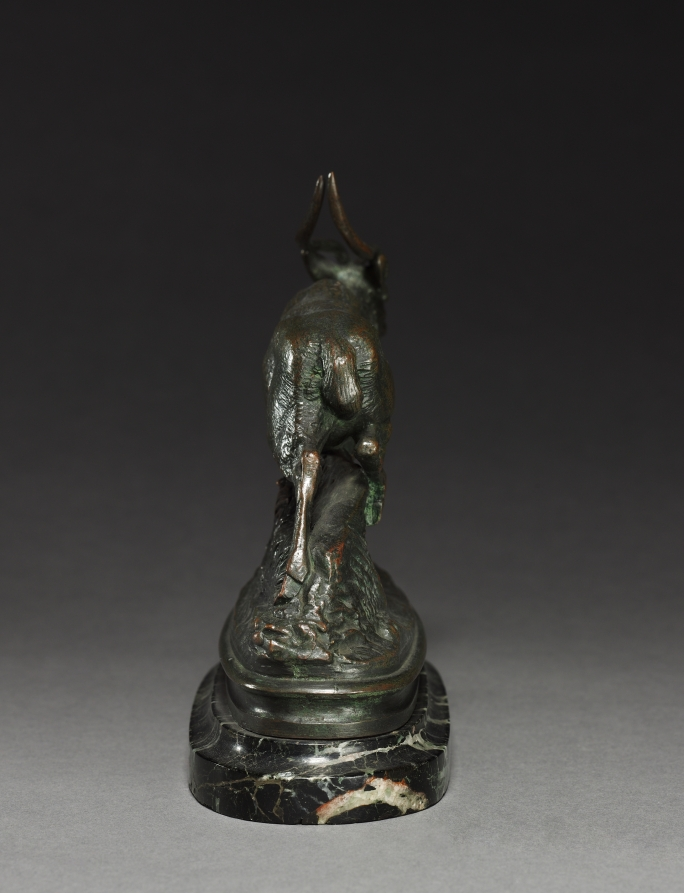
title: Axis Deer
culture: France, 19th century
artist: Antoine-Louis Barye (French, 1796–1875)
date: 19th century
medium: bronze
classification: Sculpture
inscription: Signed: "Barye"; faintly inscribed in small letters: "BARYE 21"